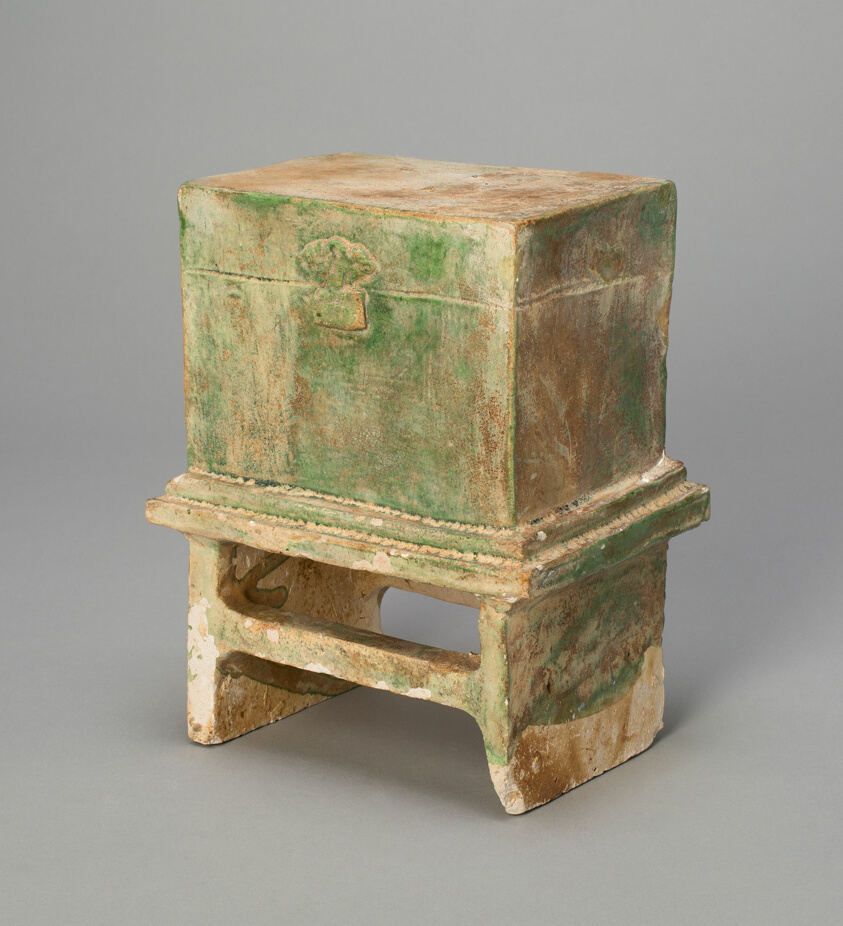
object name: Sculpture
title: Miniature Box on a Stand (Mingqi)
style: Chinese (culture or style)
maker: China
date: Ming dynasty (1368–1644)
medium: Earthenware with green glaze and underglaze molded and incised decoration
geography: China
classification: earthenware; asian art; ceramics; sculpture